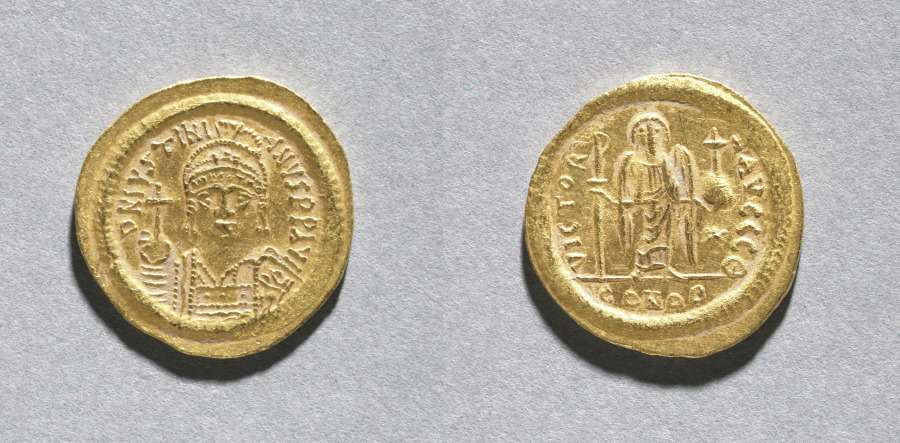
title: Solidus of Justinian I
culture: Byzantium, Constantinople, Byzantine period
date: c. 545–65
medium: gold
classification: Coins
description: The vast number of surviving Byzantine coins attests to the level of trade across the empire. Controlled and supervised by the emperor, the producers of coins took care to represent his authority and reflect his stature. Talented artists were recruited to engrave the dies (molds) used for the striking of coins. Emperors increasingly came to include their heirs and co-emperors on their coinage, as well as other family members or even earlier rulers. Coins were recognized, then as now, as small, portable works of art. With their inscriptions and images, Byzantine coins provide valuable documentation of historical events and a record of the physical appearance of the emperors. The solidus is the basic gold coin of 24 karats; the tremissis, a gold coin of one-third the weight and value of the solidus; and the nomisma, which replaced the solidus as the standard gold coin in the 900s.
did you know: This coin is a small portrait of Justinian as a powerful emperor. He wears a crown, holds an orb, and wears a ceremonial sash, all symbolizing his great power.